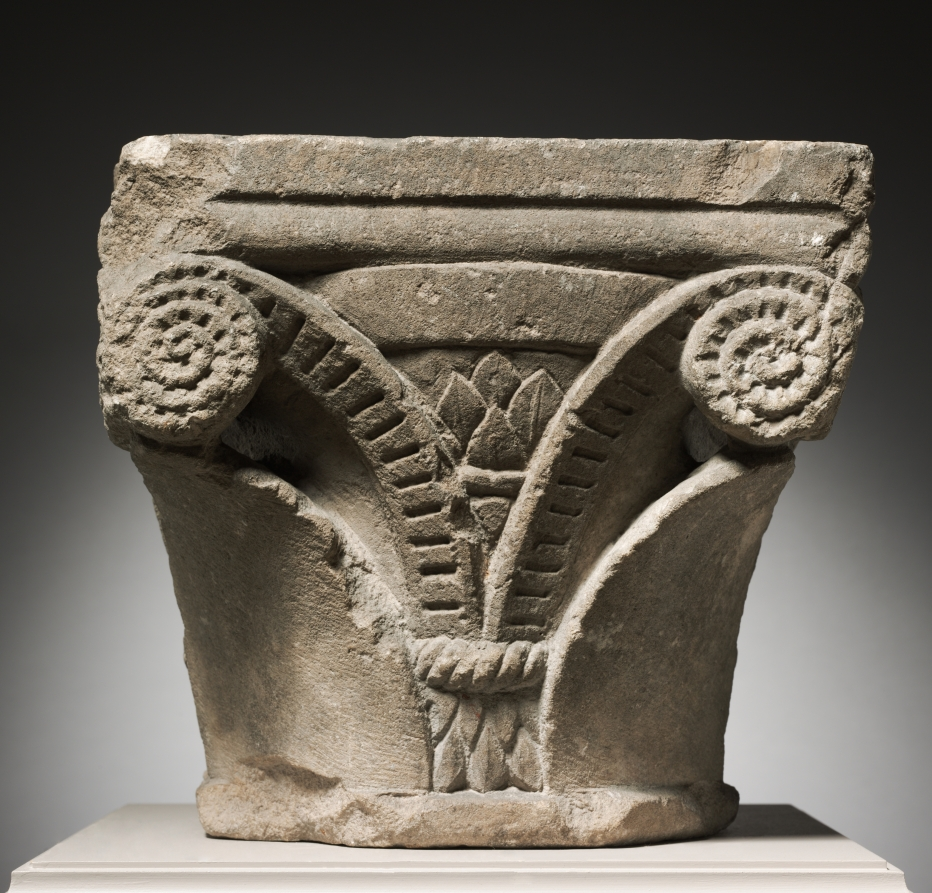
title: Capital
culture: Italy, Migration period, 8th-9th Century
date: 700s-800s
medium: marble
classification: Sculpture